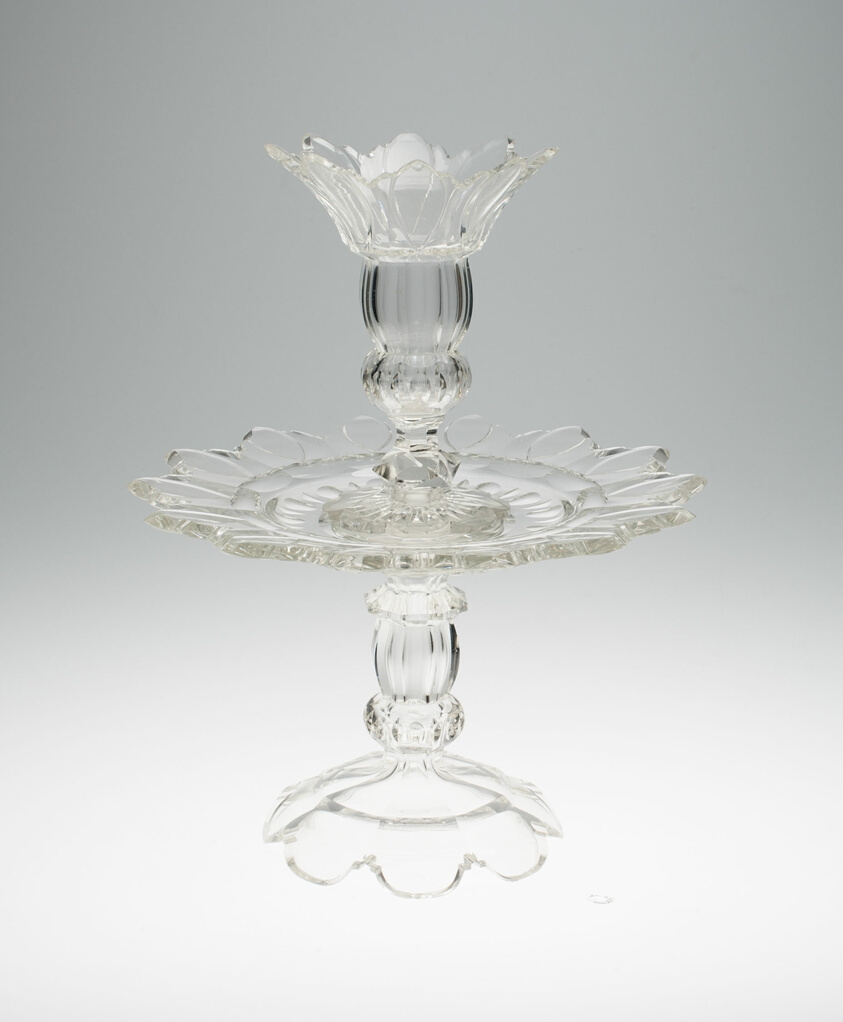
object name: Glass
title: Three-Part Garniture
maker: England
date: c. 1800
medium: Glass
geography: England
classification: glass; european decorative arts